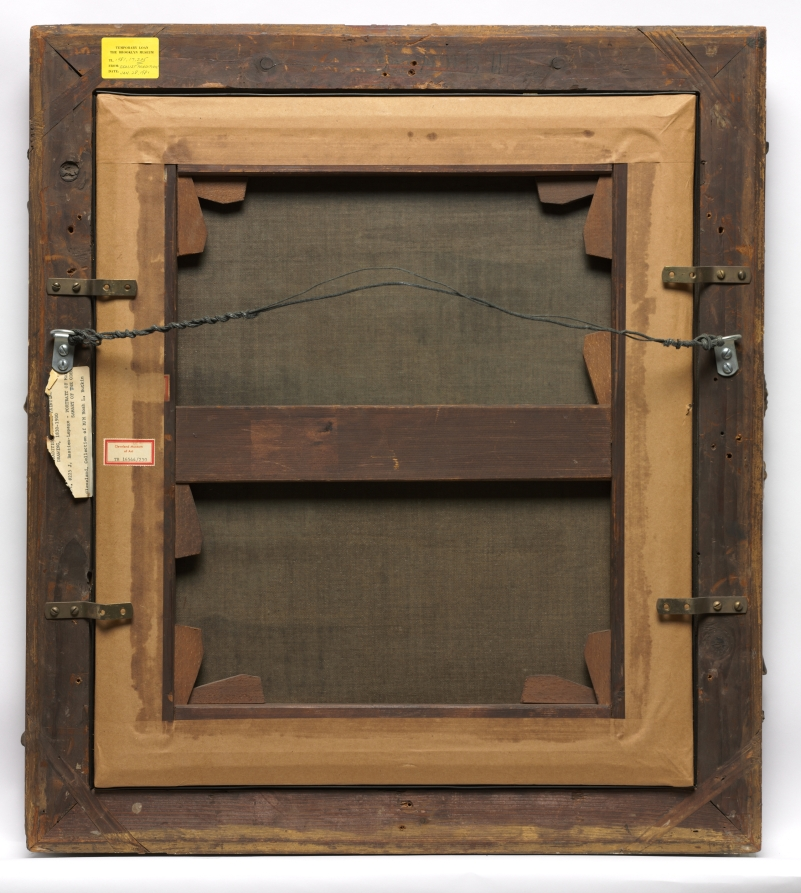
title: Marie Samary of the Odéon Theater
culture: France, 19th century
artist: Jules Bastien-Lepage (French, 1848–1884)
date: c. 1881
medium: oil on canvas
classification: Painting